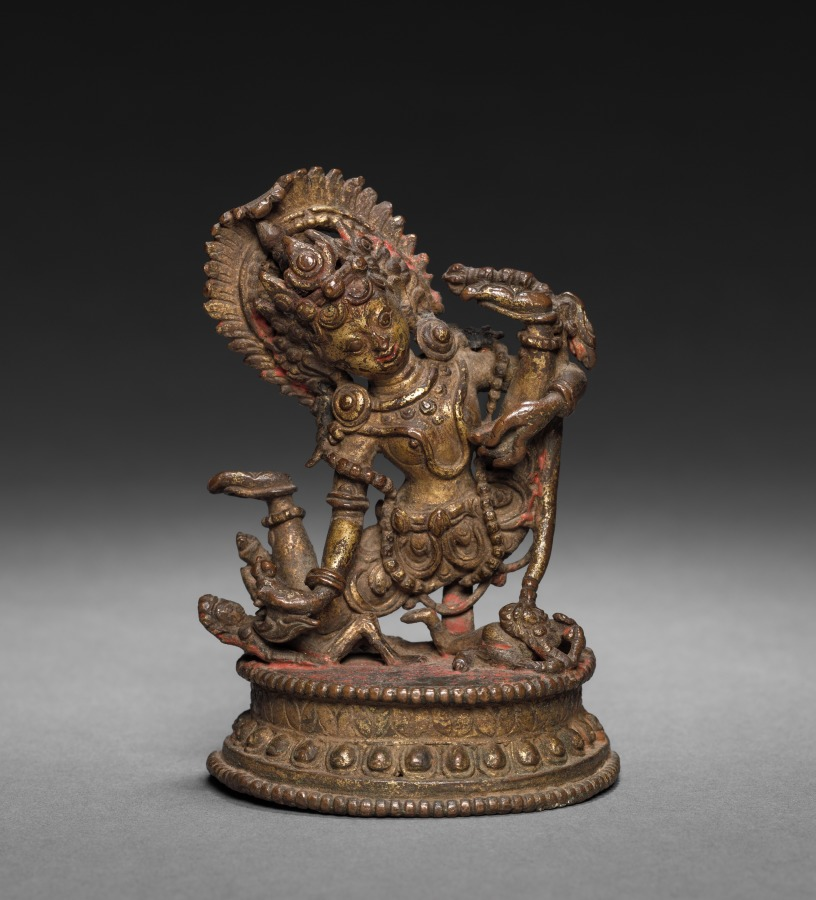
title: Achala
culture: Nepal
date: 1500s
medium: brass or bronze; turquoise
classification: Sculpture